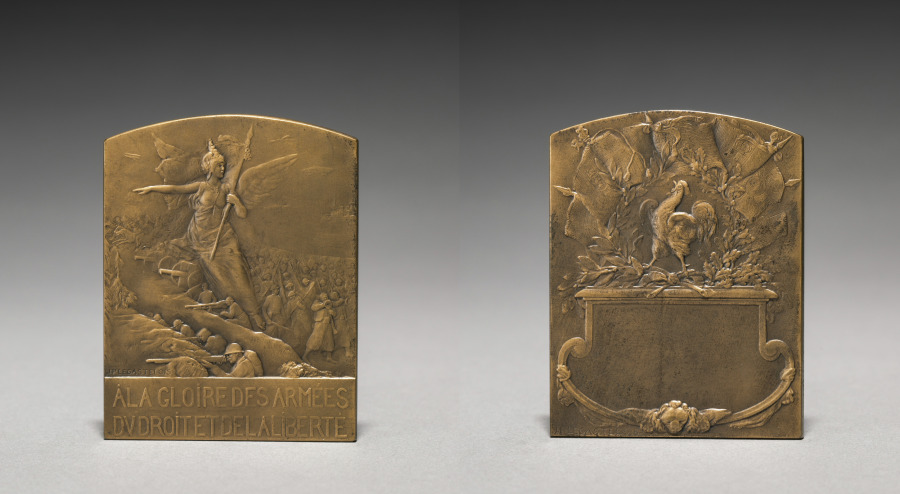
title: Medallion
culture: France, 20th century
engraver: Jules Prosper Legastelois (French, 1855–1931)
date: 1917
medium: bronze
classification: Metalwork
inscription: "La Victoire Restaure le Droit."